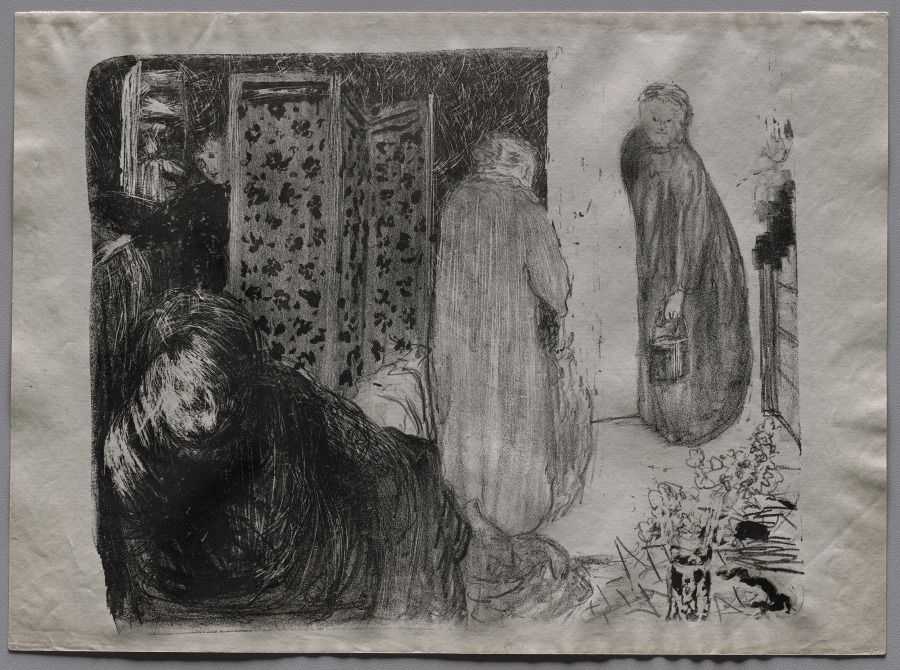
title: Interior with a Screen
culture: France, late 19th - 20th century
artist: Édouard Vuillard (French, 1868–1940)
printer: Edward Ancourt (French, 1841–1898?)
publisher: Ambroise Vollard (French, 1867–1939)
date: c. 1893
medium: lithograph on buff wove paper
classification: Print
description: During the 1890s, when Édouard Vuillard made this print, his work focused on intimate domestic scenes. Here, the artist depicted the apartment that he shared with his mother and sister, who worked as seamstresses from home. Although the women are seen going about their daily activities, Vuillard used patterning and scale to suggest a subtle sense of unease and make the everyday seem unfamiliar.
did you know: This print is one of several published by the prestigious art dealer Ambroise Vollard, who became a supporter of Édouard Vuillard's work during the 1890s.